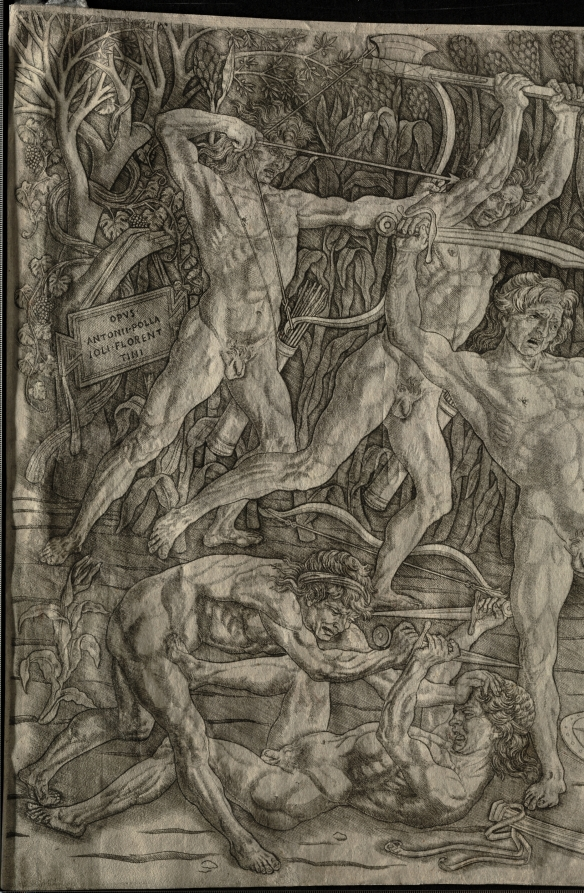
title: Battle of the Nudes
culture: Italy, 15th century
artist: Antonio del Pollaiuolo (Italian, 1431/32–1498)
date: 1470s–80s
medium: engraving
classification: Print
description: This engraving is one of the earliest Renaissance prints to portray the nude male body in action. Antonio del Pollaiuolo’s grimacing warriors appear like clones in different poses. The print may have functioned as a model for workshop apprentices studying human anatomy while learning to draw; however, the artist’s Latin signature suggests it also had an audience educated in literature. Art historians remain uncertain whether Pollaiuolo intended to depict a particular story or historical event. It is possible he created a deliberately ambiguous allegory that would appeal to patrons interested in interpreting symbols. For example, the continuous chain shared by the two central men could refer to an ancient idea that the body is the chain of the soul, only to be released in death.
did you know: Considered a groundbreaking work in the history of the Italian Renaissance, the CMA holds the only known impression of the print's first state.